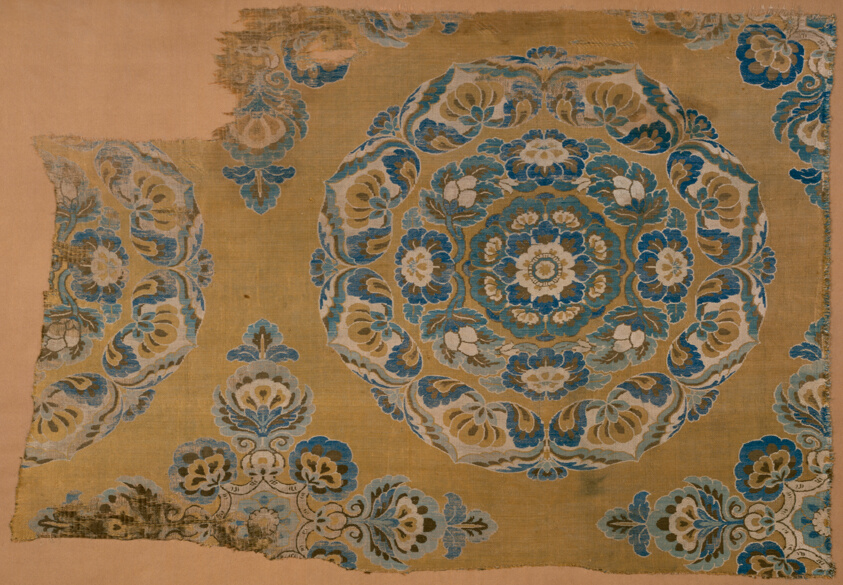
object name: Textile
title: Fragment (Dress Fabric)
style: tang, Chinese (culture or style), East Asian, asian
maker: China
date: Tang dynasty (A.D. 618–906), late 8th/early 9th century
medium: Silk, weft-float faced 1:2 'S' twill weave of complementary wefts and inner warps (samite)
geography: China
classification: weaving; textile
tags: plant-derived motif, flowers